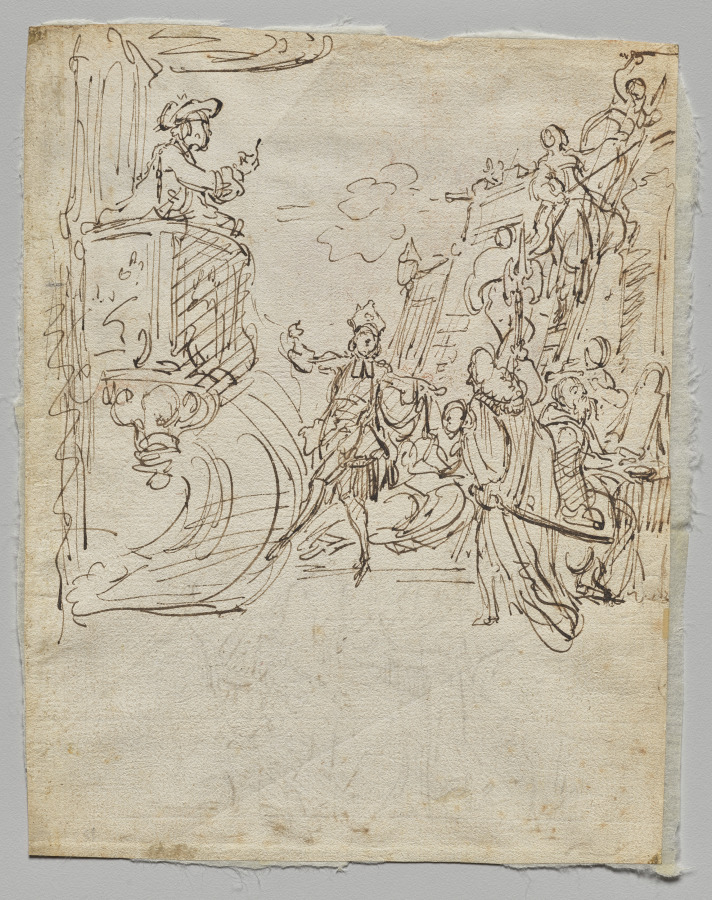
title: Lingerie Boutique and Conversation (verso)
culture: France, 18th century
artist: Gabriel de Saint-Aubin (French, 1724–1780)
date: c. 1765–75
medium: Pen, brown ink, laid paper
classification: Drawing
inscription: Watermark: C(?) TORE(?)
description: Gabriel de Saint-Aubin was known for his distinctively sketchy style and interest in depicting performances such as dance and theater, the subjects seen here. The artist developed a distinctive composite style of sketching, and this work exemplifies his practice of covering both sides of a sheet of paper with diverse images in varying media.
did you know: Because of Gabriel de Saint-Aubin’s focus on social events and contemporary culture, his drawings are considered important records of eighteenth-century Parisian life.